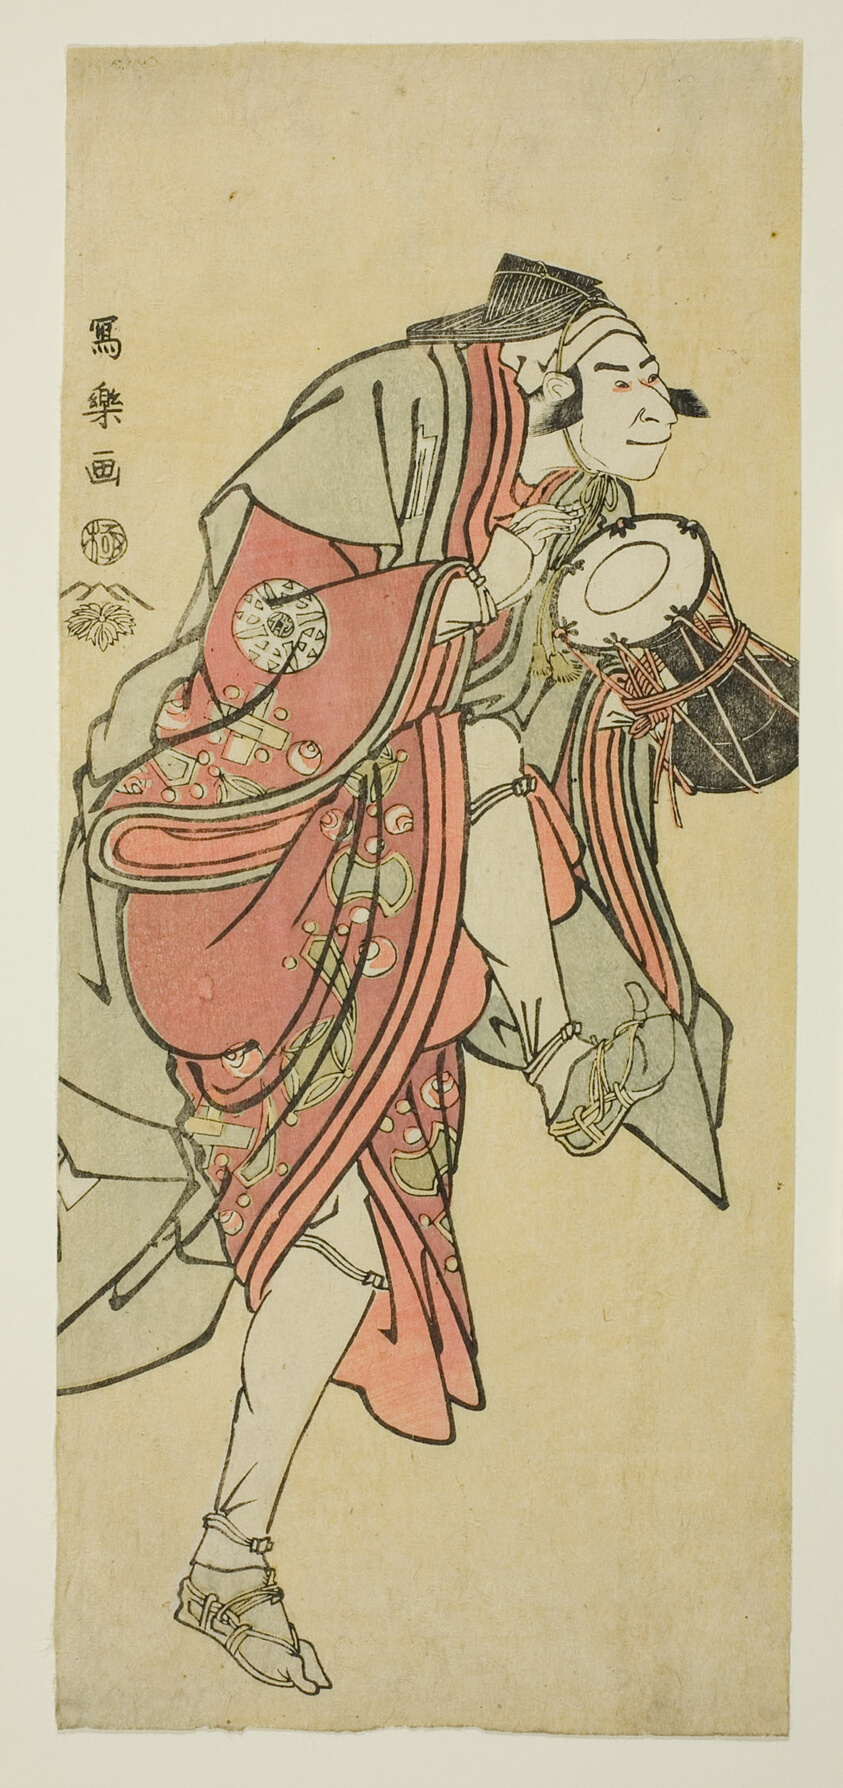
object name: Print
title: Nakamura Nakazo II in the Role of Aramaki Mimishiro Kanetora Disguised as Saiwaka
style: Japanese (culture or style)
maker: Toshusai Sharaku 東洲斎 写楽; Japanese, active 1794-95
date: 1794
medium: Color woodblock print; hosoban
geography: Japan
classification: woodblock print; print; asian art